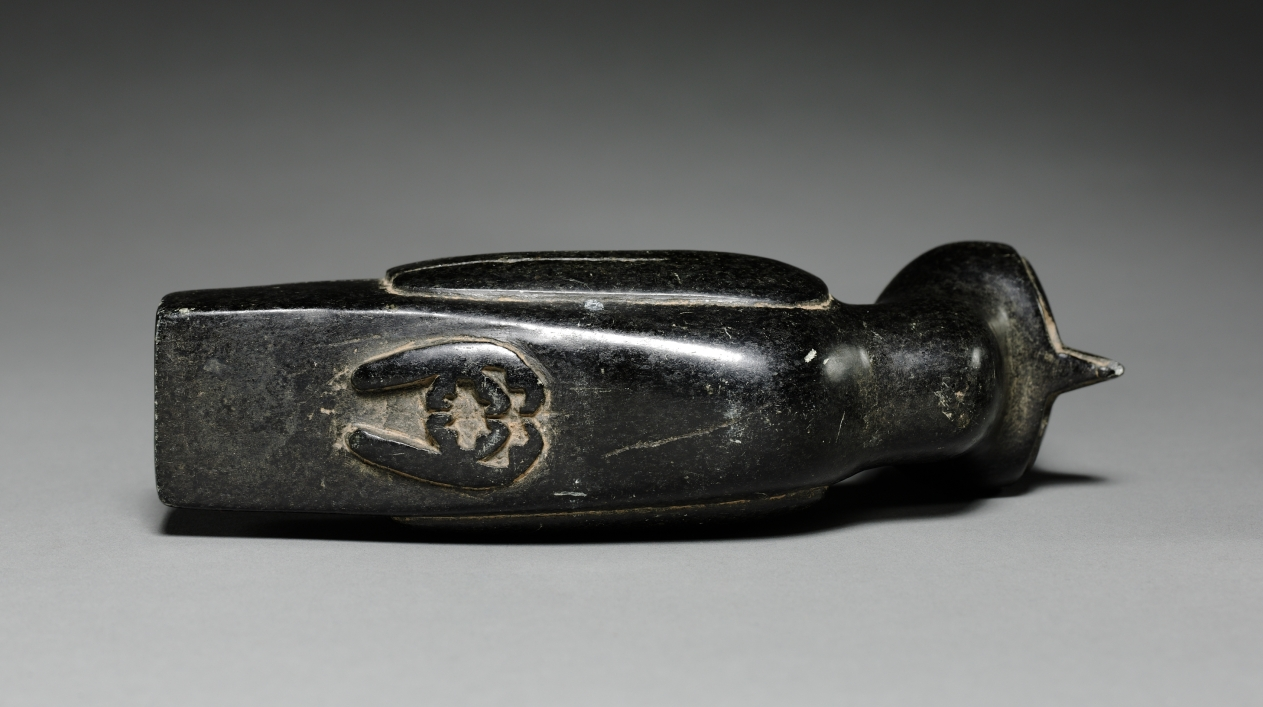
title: Pipe in the Form of an Owl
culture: America, North American Indian, Copena Culture (Tennessee area?)? or modern reproduction, Middle Woodland Period (100-600) or 20th century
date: 100–600 CE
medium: stone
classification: Sculpture